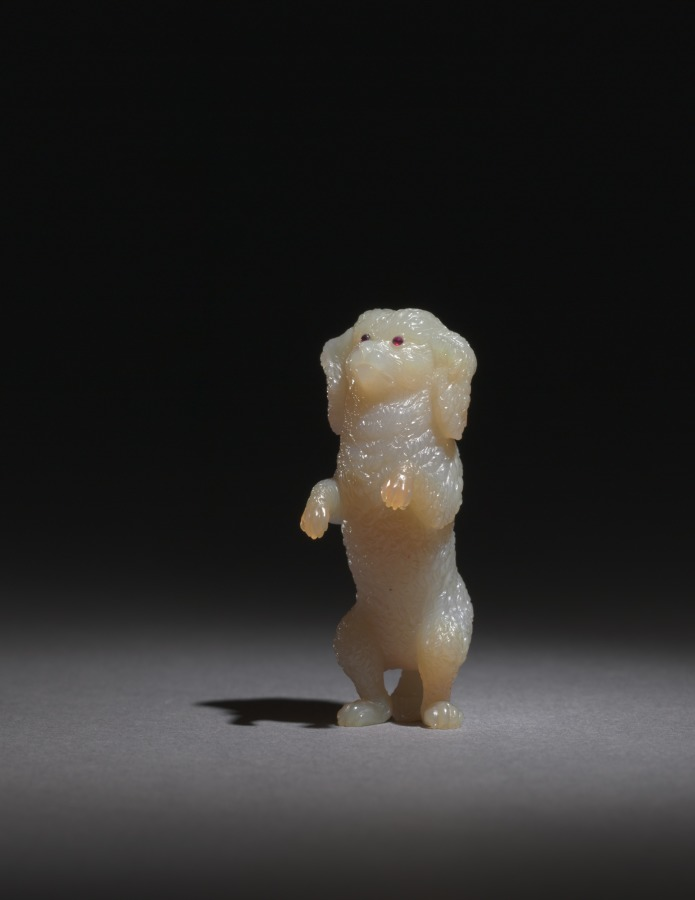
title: Begging Poodle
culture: Russia, St. Petersburg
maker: House of Fabergé (Russian, 1842–1918)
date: c. 1895–1915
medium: agate, rubies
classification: Miscellaneous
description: In creating luxurious accessories for a desk or tabletop, the House of Fabergé often used native hardstones such as multicolored agate and jasper, green nephrite, pink rhodonite, and rock crystal found in the Ural Mountains of western Russia. By paying careful attention to the unique colors and textures of the stones, Fabergé and his craftsmen brought them to life, turning milky agate into this figure of a begging poodle or brown and black jasper into sleeping puppies. The use of native materials also promoted Russian nationalism, which appealed greatly to the tsar and his family.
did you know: Small sculptural figures of animals date back to ancient cultures that prized them both for sustenance and mythical godliness.